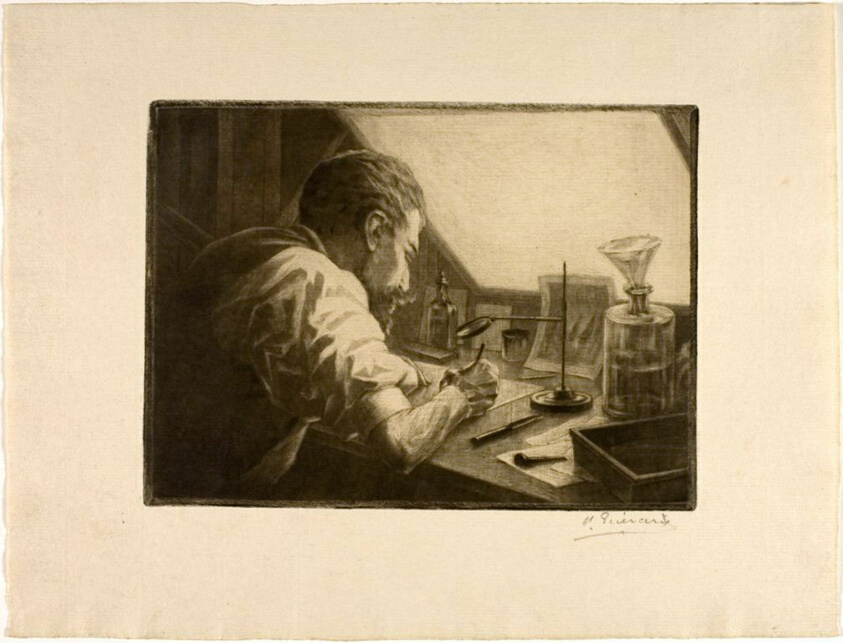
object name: Print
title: Self-Portrait Preparing an Etching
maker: Henri Charles Guérard (French, 1846-1897)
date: c. 1890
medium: Line etching with roulette and mezzotint on cream laid paper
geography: France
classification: print; prints and drawing